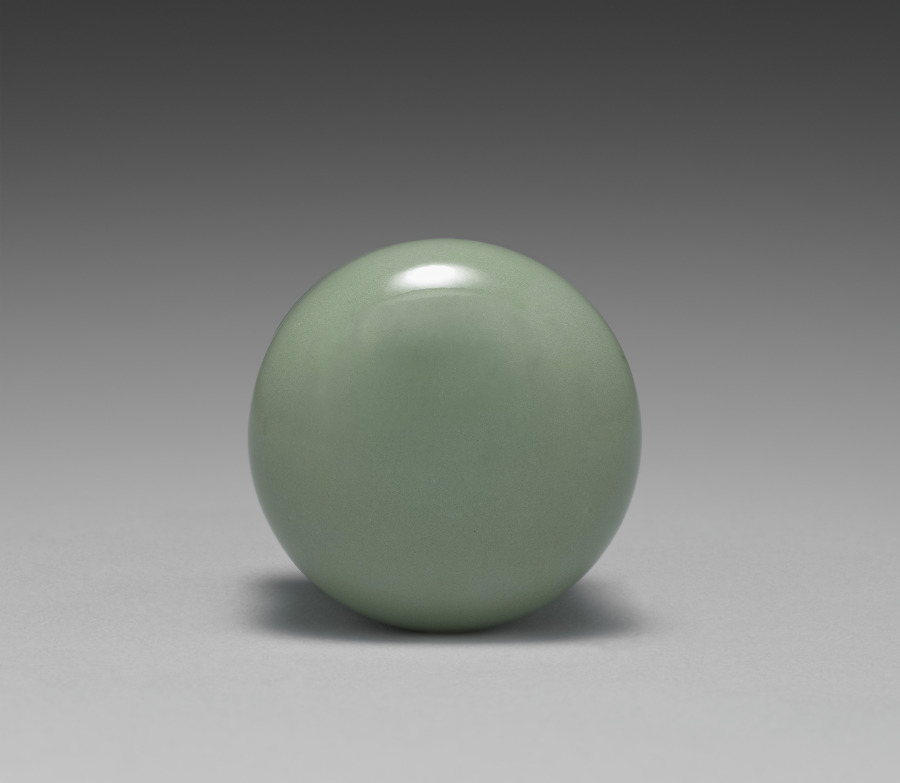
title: Roller End for Hanging Scroll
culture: Japan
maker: Seifū Yohei III (Japanese, 1851–1914)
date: 1893–1914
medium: One of a pair of hanging scroll roller ends; porcelain with celadon glaze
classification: Ceramic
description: Before entering into his apprenticeship with Yohei II, Seifū Yohei III trained as a painter in Osaka. He continued to paint throughout his career as a ceramist. As part of his ceramic practice, Yohei III also made roller ends to be placed at either end of the wooden dowel around which the lower part of a hanging scroll mounting is wrapped. These served both as weights for the painting and as knobs for handling it when rolling and unrolling. The pair here is made of porcelain with a green glaze.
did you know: This is one of two roller ends for the hanging scroll by Seifū Yohei III, Rain Clearing over a Summer’s Mountain, CMA 2022.151.